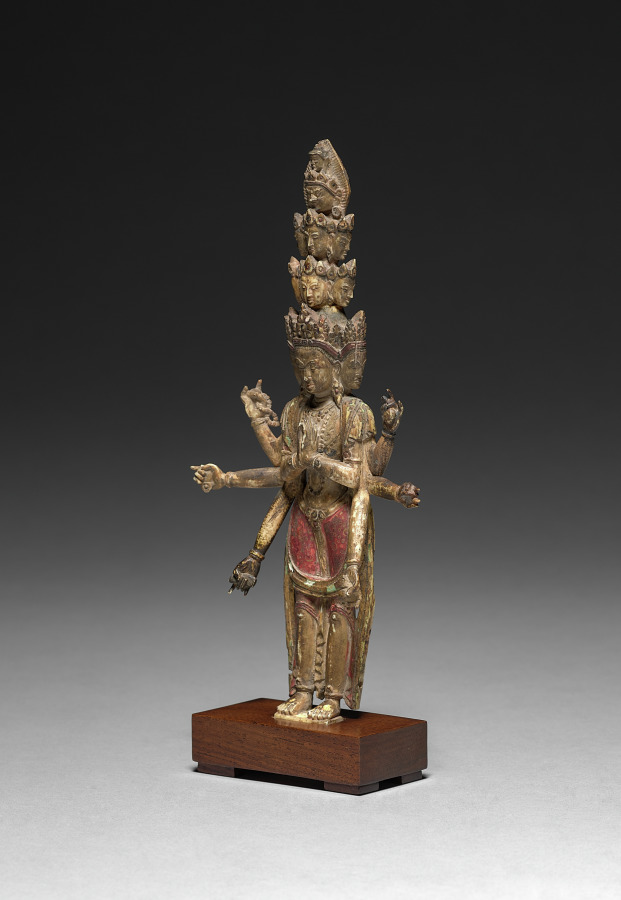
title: Eleven-Headed Avalokitesvara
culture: Nepal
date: 1500s–1600s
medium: painted ivory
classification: Ivory